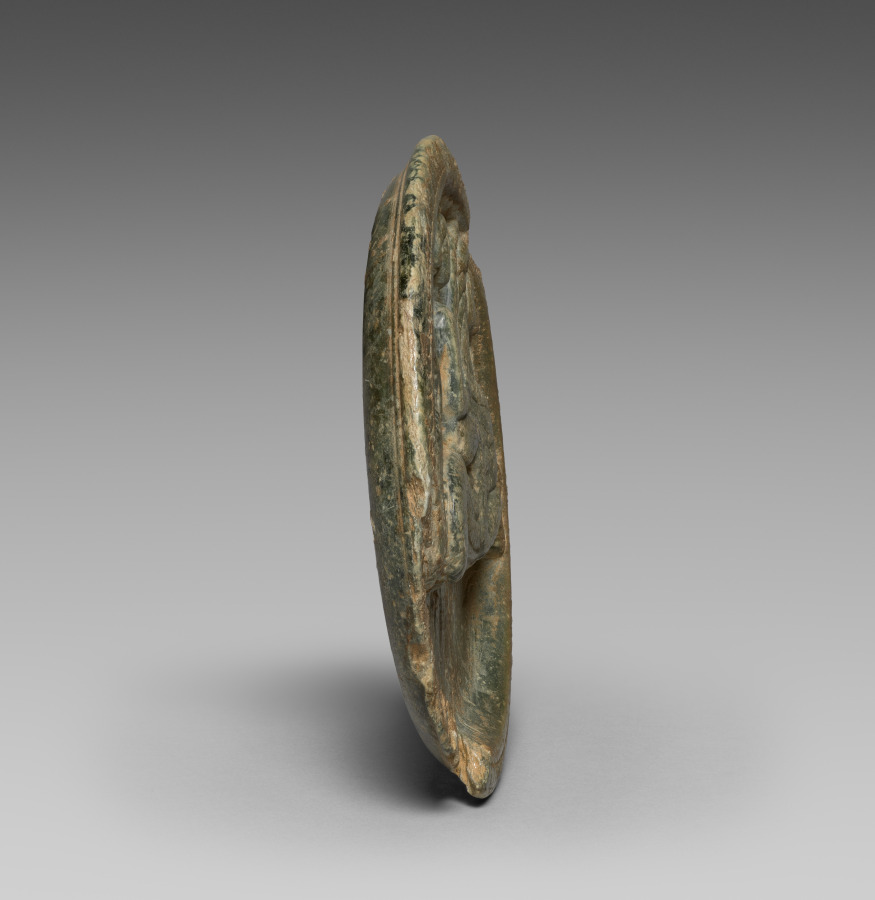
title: Patera with Man Riding Monster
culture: India, Gandhara, Taxila, Palera period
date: 1–200 CE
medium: gray schist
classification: Sculpture